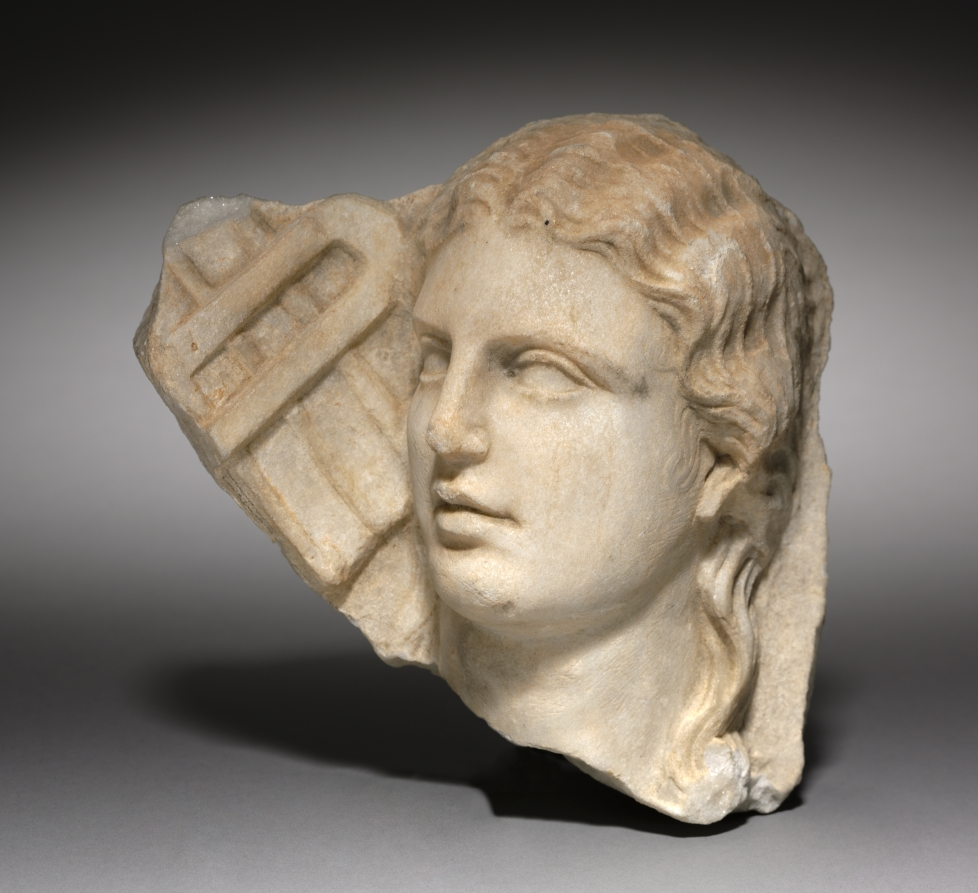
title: Head of a Woman Holding a Sistrum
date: 150 BCE–50 CE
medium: marble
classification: Sculpture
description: This head of a woman was likely originally part of a stele or grave marker. The woman sits in partial profile holding a sistrum close to her head, possibly making music. A sistrum is a type of rattle that originated in ancient Egypt and spread to the Greek world. (View a sistrum in the collection here: 1920.1990.) The sistrum likely signaled to ancient viewers that the woman on the grave marker was a worshiper of the Egyptian goddess Isis, whose cult spread throughout the Mediterranean after Alexander the Great took over Egypt.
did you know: A sistrum (rattle) can have either three or four branches through the body of the instrument.